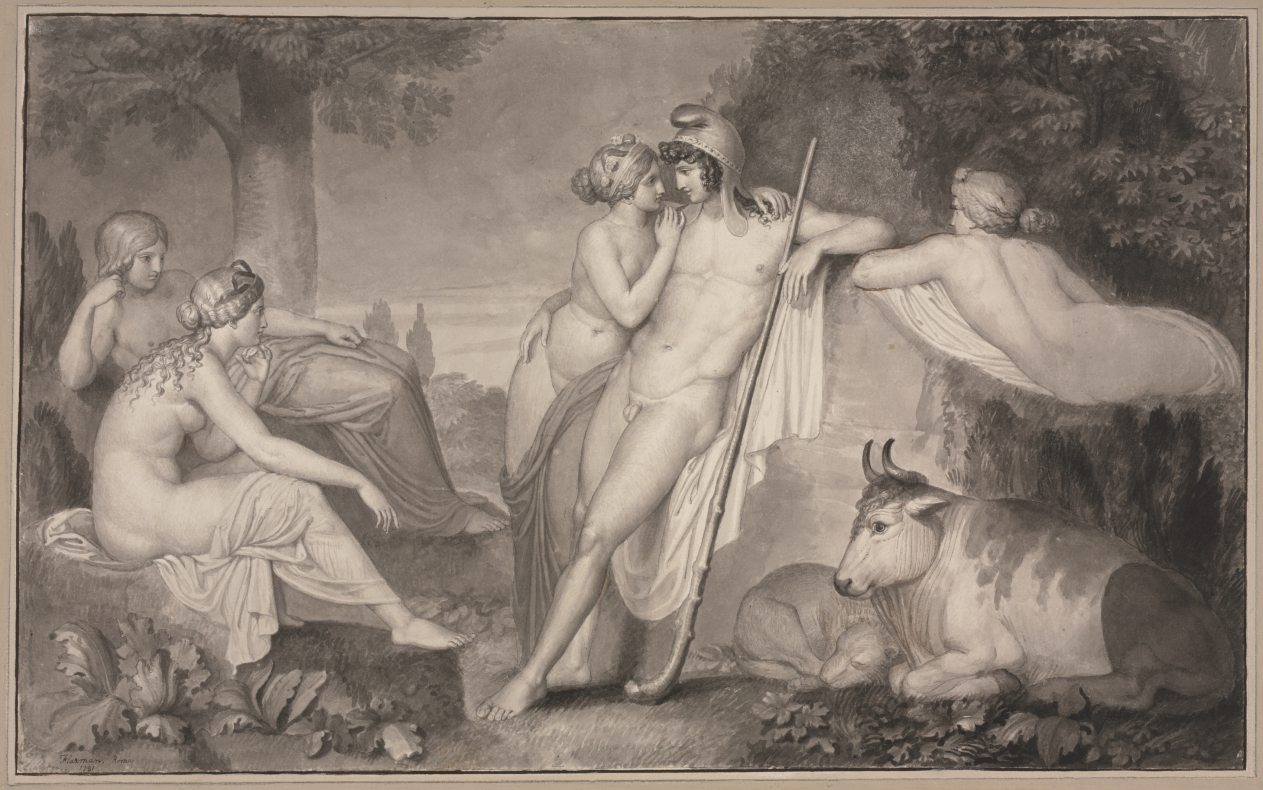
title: Paris and Oenone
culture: England, 18th century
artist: John Flaxman (British, 1755–1826)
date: 1791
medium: brush and gray wash with pen and pale gray-black ink with graphite and brown ink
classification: Drawing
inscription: signed and dated, in black ink, at lower left: Flaxman, Roma / 1791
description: Although he identified himself first and foremost as a sculptor, John Flaxman’s greatest fame and most lasting influence rest with his drawings. Engravings made after his spare designs illustrating classical epics by Homer, Dante, and Hesiod became the most celebrated work in his oeuvre and spread his stylized linearity widely. This highly finished, signed and dated drawing was made while Flaxman was in Rome and needed to supplement his income while trying to obtain commissions for sculpture. Flaxman chose an obscure classical subject: the famous Trojan shepherd, Paris, with his first love, the nymph Oenone. The scene takes place on Mount Ida, in an idyllic time of peace before Paris was called upon to judge the beauty of the goddesses Hera, Athena, and Aphrodite, thus instigating the Trojan War.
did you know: John Flaxman called his drawings "outlines," referring to their sparse style.